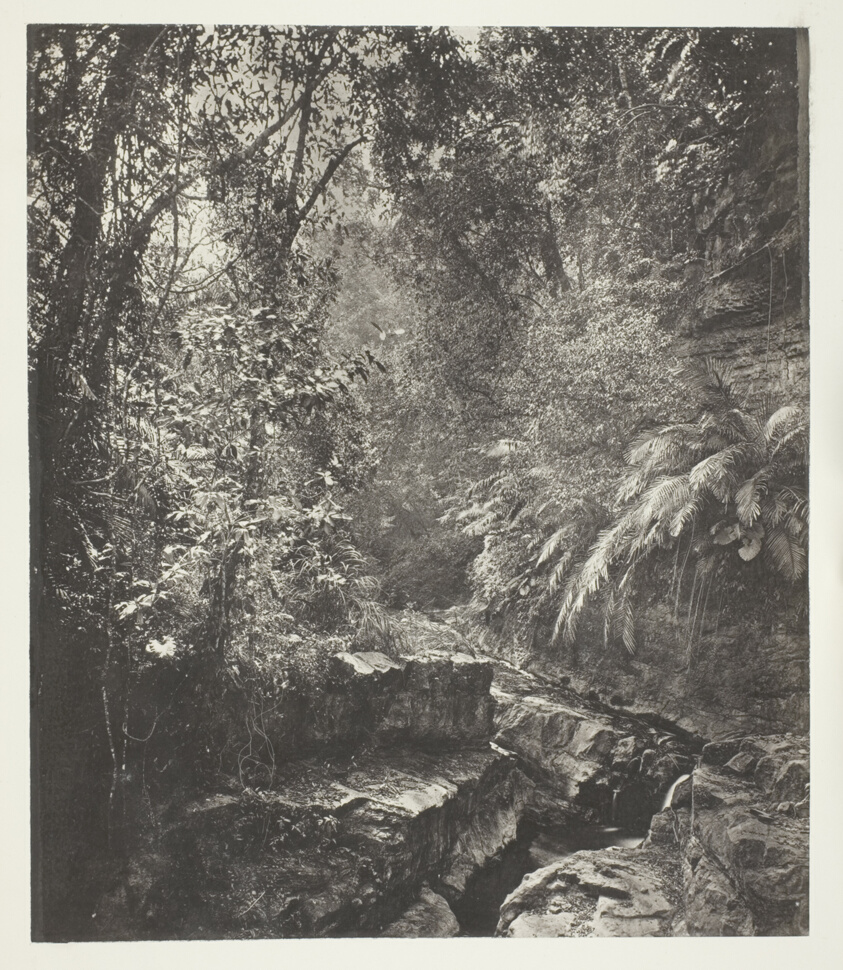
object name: Photograph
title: A Mountain Pass in Formosa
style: 19th century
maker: John Thomson (Scottish, 1837–1921)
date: c. 1868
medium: Collotype, pl. XXIV from the album "Illustrations of China and its People, Volume I" (1873)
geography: Scotland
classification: photography; photograph